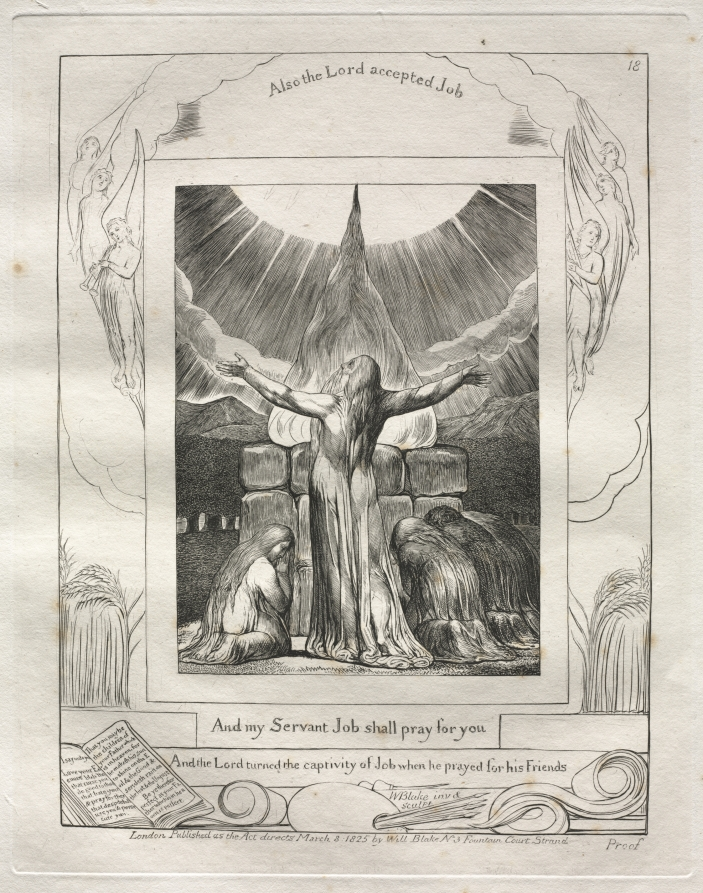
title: The Book of Job: Pl. 18, And my Servant Job shall pray for you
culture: England, 18th century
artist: William Blake (British, 1757–1827)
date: 1825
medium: engraving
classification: Portfolio